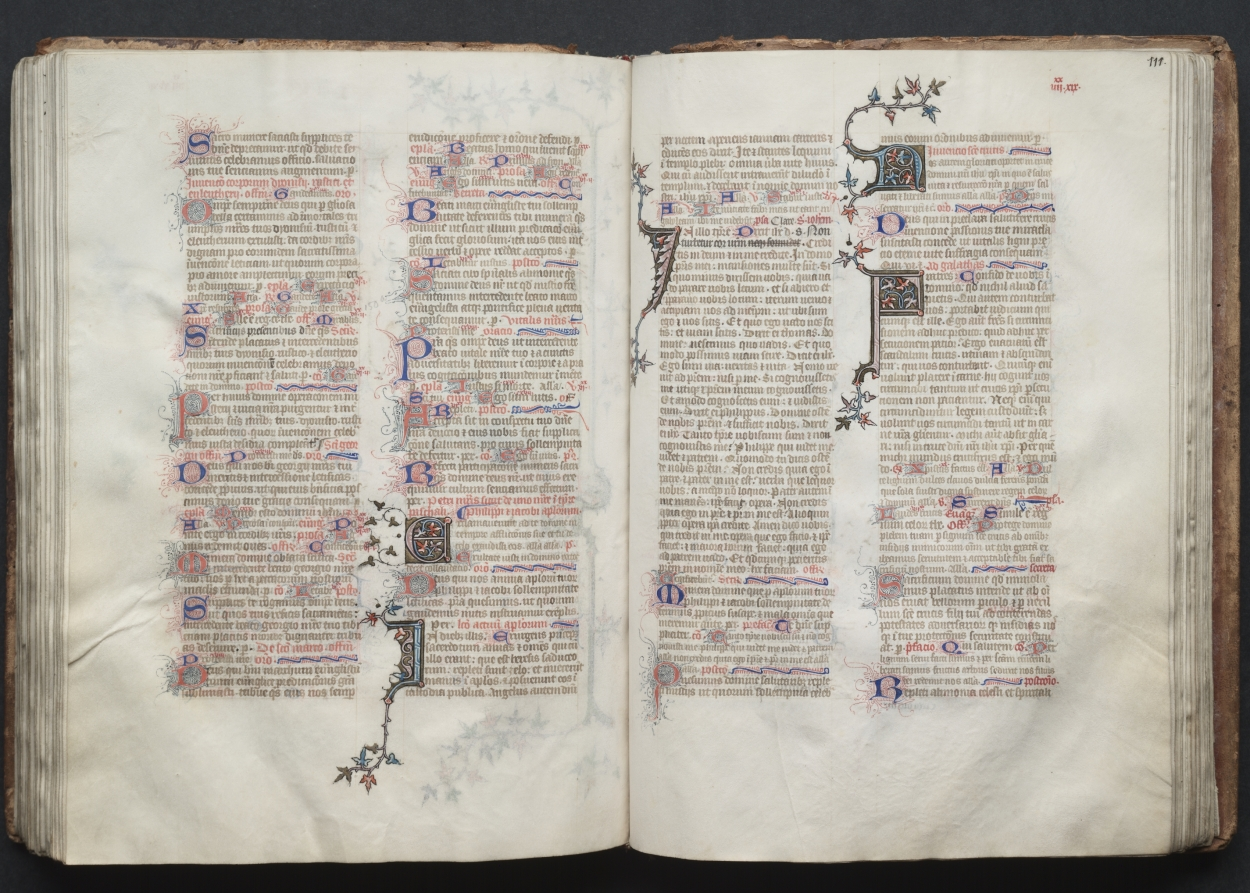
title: The Gotha Missal: Fol. 111r, Text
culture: France, Paris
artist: Master of the Boqueteaux (French)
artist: and Workshop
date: c. 1375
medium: ink, tempera, and gold on vellum; blind-tooled leather binding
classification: Bound Volume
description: The style and quality of this manuscript's decoration is typical of deluxe Parisian books made for aristocratic or royal patrons. Most of the book's decoration appears to be the work of the Master of the Boqueteaux, an artist active at the court of King Charles V (died 1380). His style was apparently shared by a number of book illuminators working in and around Paris. It is very possible that the Gotha Missal belonged to Charles V, but is not provable because the manuscript has no royal portraits and lacks a colophon. Given the book's magnificent decoration, however, it would seem that it was produced for a Valois prince, if not for the king himself. The manuscript receives its name from the German dukes of Gotha, its later owners.